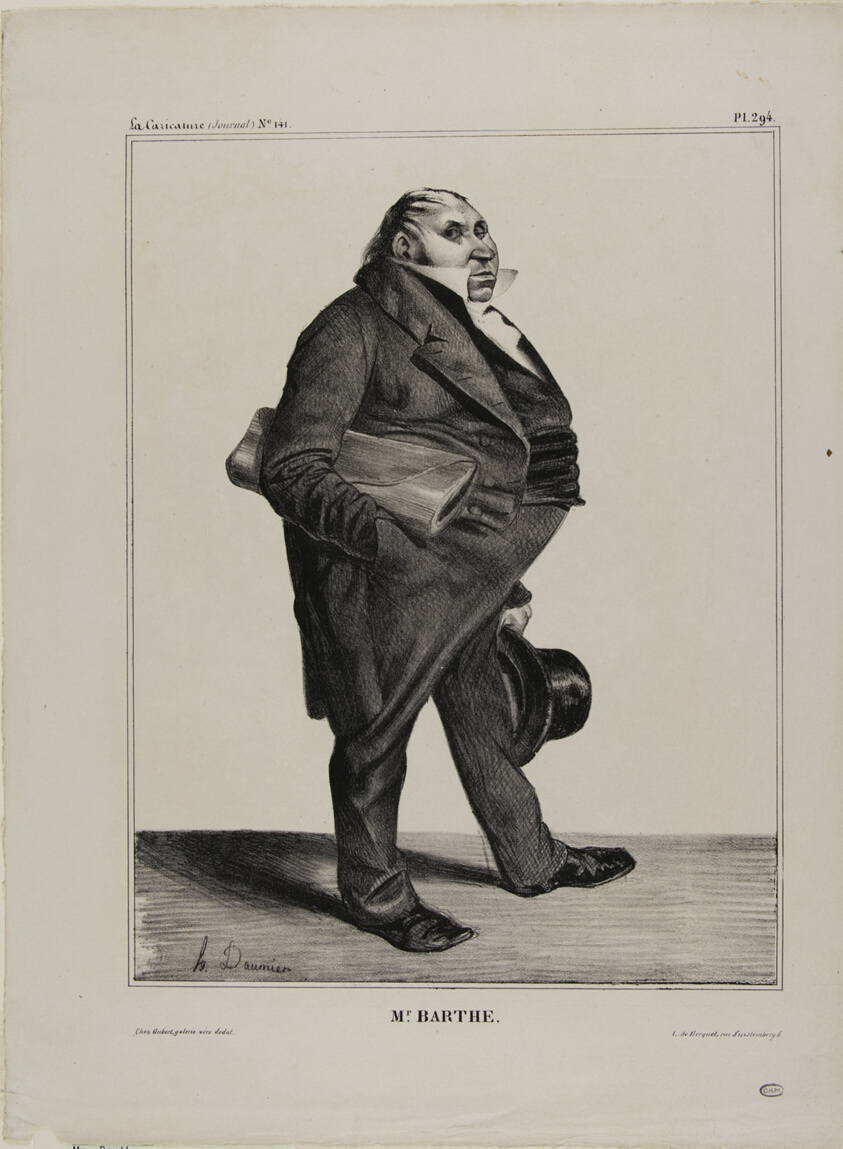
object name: Print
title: Mr. Barthe, plate 294 from Célébrités de la Caricature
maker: Honoré Victorin Daumier; French, 1808-1879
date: 1833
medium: Lithograph in black on ivory wove paper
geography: France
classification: lithograph; print; prints and drawing